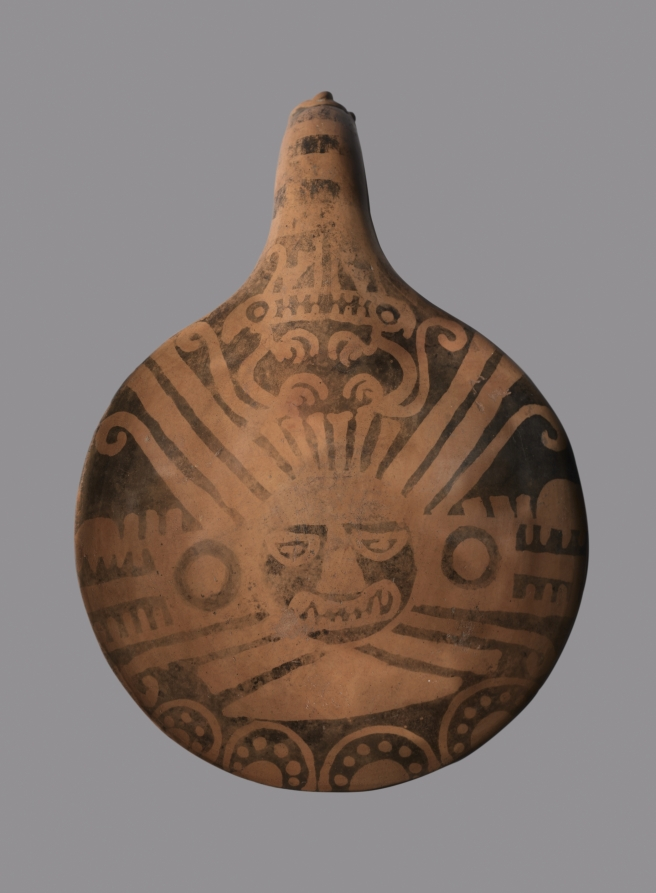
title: Dipper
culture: Peru, North Highlands, Recuay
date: 100 BCE–700 CE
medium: ceramic, slip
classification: Ceramic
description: Both of these objects feature a creature known as the "Recuay feline," although it could also refer to a fox, dog, or viscacha (a rodent). Whatever its identity, the prominent crest on its head ties it to the supernatural realm, a connection underlined by the deity head that also appears on the dipper and by the ritual function of snuff tablets, which were used to inhale hallucinogenic snuffs during religious ceremonies.